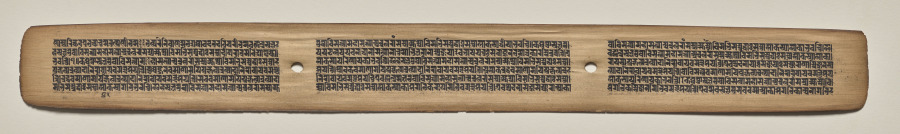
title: Text, Folio 105 (recto), from a Manuscript of the Perfection of Wisdom in Eight Thousand Lines (Ashtasahasrika Prajnaparamita-sutra)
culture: Eastern India, Bihar, Vikramashila Monastery. Painting: Nepal, Kathmandu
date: Sunday, September 14, 1119 (year 239 of the Newar Samvat in the month of Ashvina)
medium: gum tempera and ink on palm leaves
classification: Painting